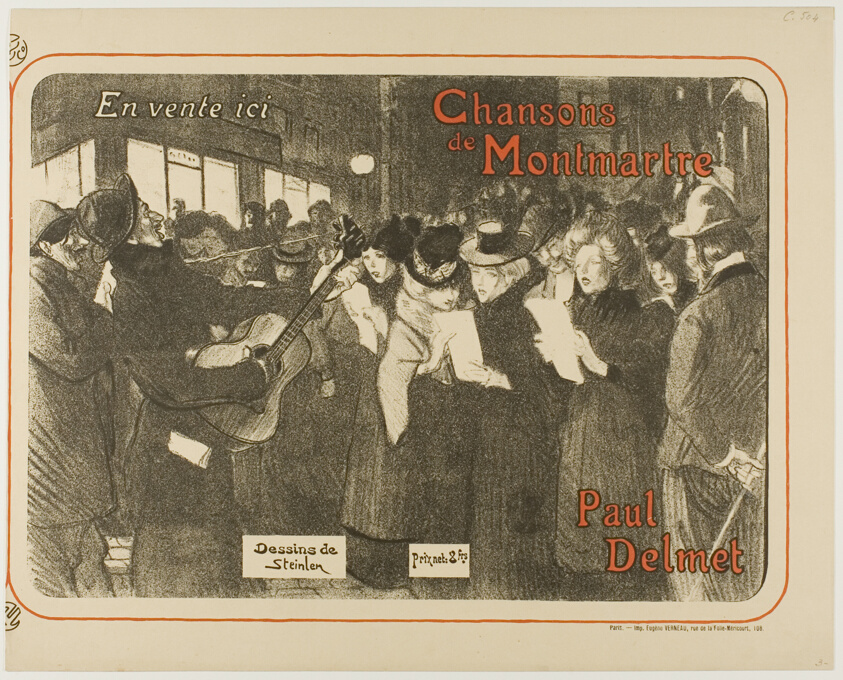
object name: Print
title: Chansons de Montmartre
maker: Théophile-Alexandre Steinlen; French, born Switzerland, 1859-1923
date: 1899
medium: Lithograph in black and red on cream wove paper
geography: France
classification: lithograph; print; prints and drawing